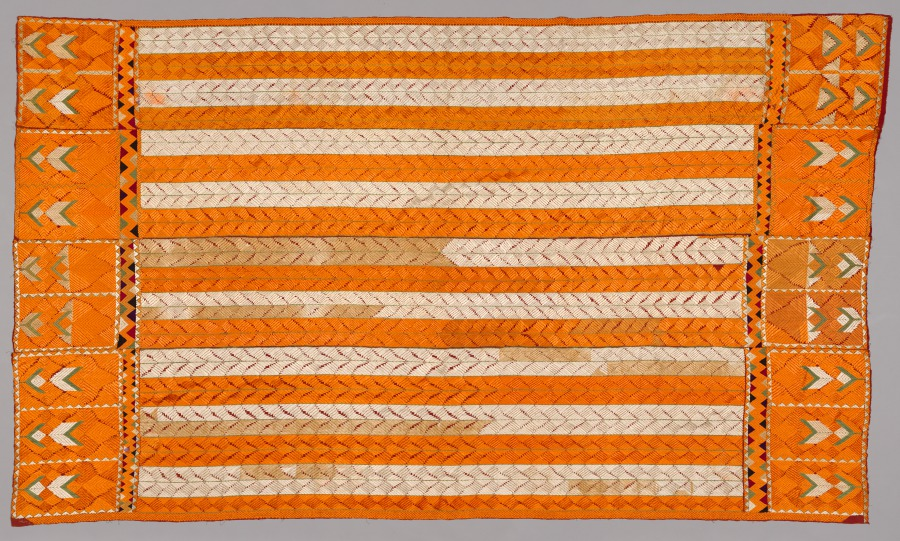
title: Shawl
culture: India, Punjab, 19th century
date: 1800s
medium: embroidery (phulkari); cotton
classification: Embroidery